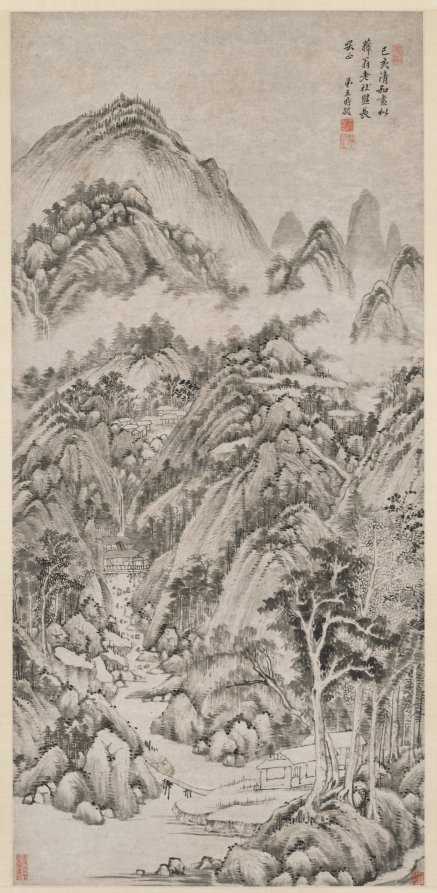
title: Mountain Village Embraced by the Summer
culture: China, Qing dynasty (1644-1911)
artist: Wang Shimin (Chinese, 1592–1680)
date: 1659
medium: hanging scroll, ink on paper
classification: Painting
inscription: Artist's inscription, signature, and 3 seals: [seal] Ouxie 偶諧. In the jihai year [1659], the fourth lunar month, I painted this for T'o-weng, my senior in our literary club, for your amusement and correction. Your junior Wang Shimin. [seals] Wang Shimin yin 王時敏印; Xunzhi 遜之.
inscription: 2 additional seals: 1 of Jiang Gusun [Chiang Ku-sun] 將穀孫 (20th century); 1 of C. C. Wang 王季遷 (1907–2003).